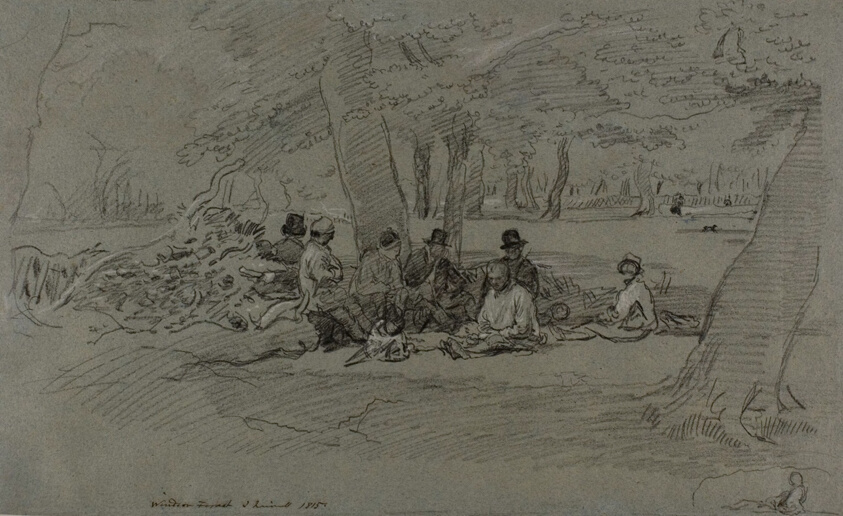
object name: Drawing and Watercolor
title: The Woodcutters' Repast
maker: John Linnell (English, 1792-1882)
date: 1815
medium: Black and white chalks on blue wove paper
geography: England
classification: chalk; drawings (visual works); prints and drawing